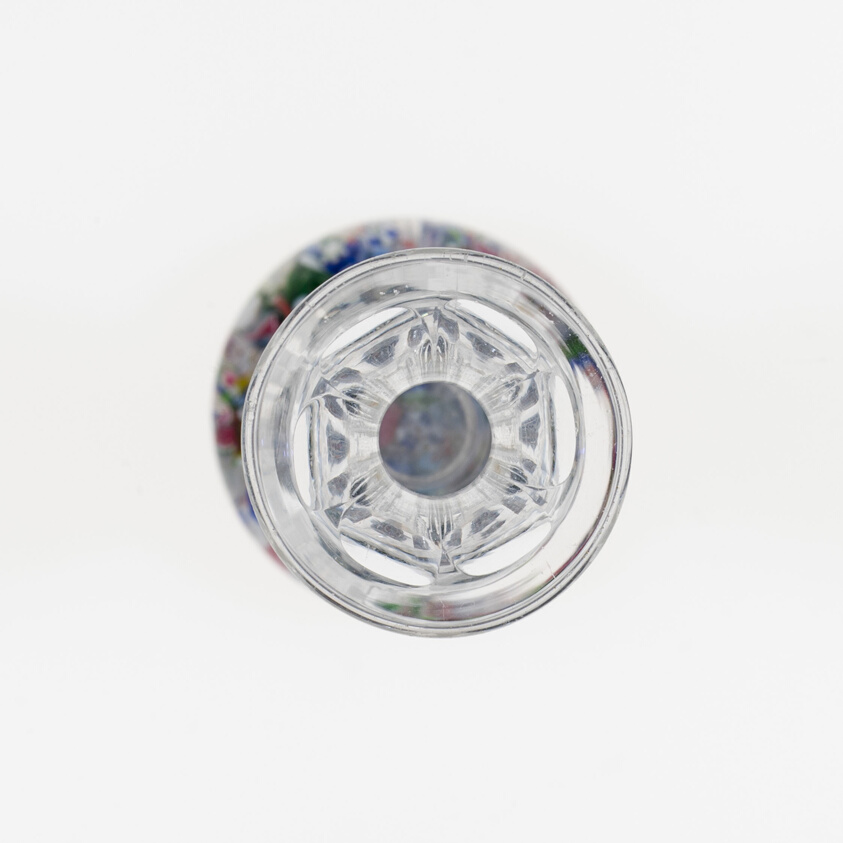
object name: Glass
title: Vase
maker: Saint-Louis Glassworks (Cristalleries de Saint-Louis); Lorraine, France, founded 1586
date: c. 1845–60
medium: Glass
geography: Saint-Louis-lès-Bitche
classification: paperweight; glass